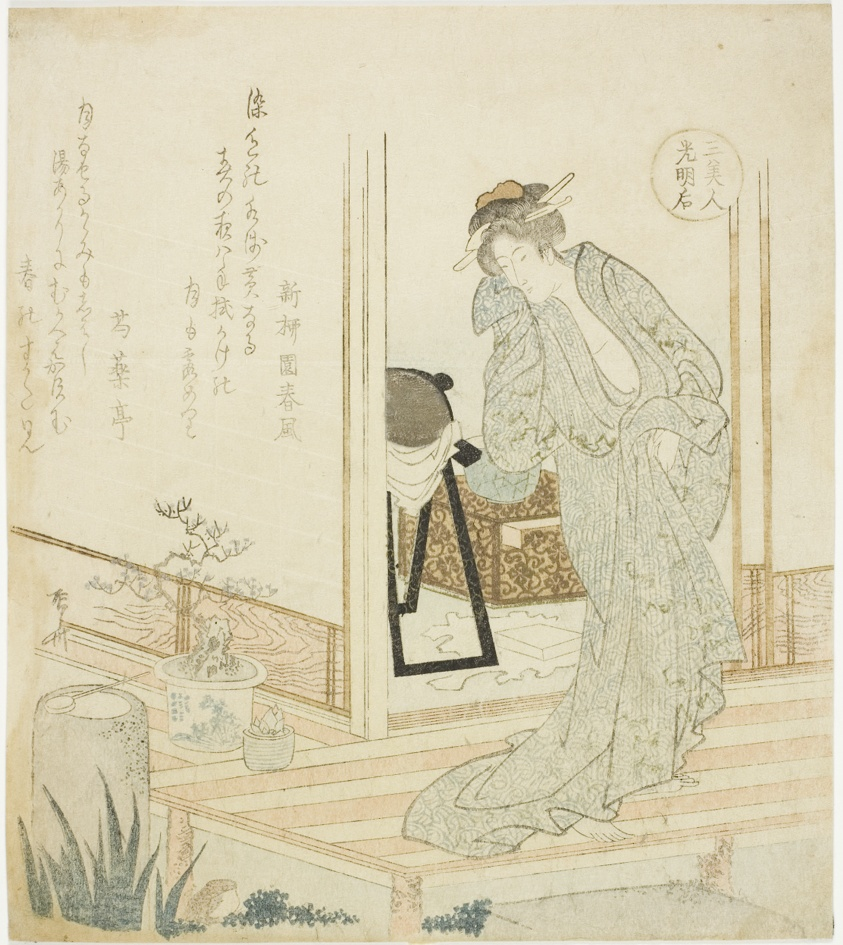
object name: Print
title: Empress Komyo (Komyoko), from the series "Three Beautiful Women (San bijin)"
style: Japanese (culture or style)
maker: Ryuryukyo Shinsai (Japanese, c. 1764-1820)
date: c. 1820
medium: Color woodblock print; shikishiban, surimono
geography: Japan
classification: woodblock print; print; asian art